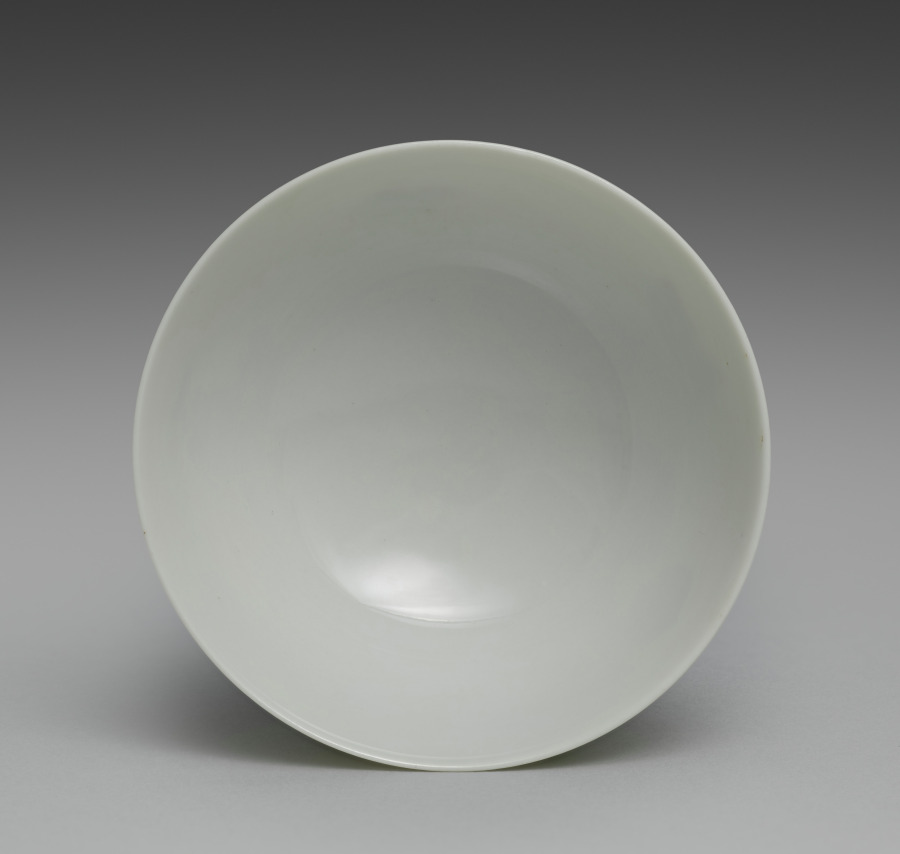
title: Teabowl from Teabowls with Peony and Crabapple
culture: Japan, Meiji period (1868–1912)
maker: Seifū Yohei III (Japanese, 1851–1914)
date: 1893–1914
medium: One from a set of five teabowls; porcelain with underglaze and overglaze color enamels and gold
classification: Ceramic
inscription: 清風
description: Overglaze color enamels are generally called iro-e (literally “color picture”) in the terminology customarily used for porcelain decoration of the Edo period. This set of teabowls is a fine example of Yohei III’s skilled use of the technique, which is identified on this set’s box lid with the alternate phrasing “porcelain with color painting” (jisaiga). Distinct from the way overglaze colors were used in Kakiemon ware from Arita, his designs and applications show a consciousness of porcelain decoration of the Qing dynasty. Here, he combines Chinese models with a sensibility taken from Kyoto ware precedents, including painting with powdered gold (kinrande). The colors used in the bowls are as follows: blue, black, gold, white, light green, green, and pink. The blue appears only inside the footring, as a double band of underglaze color. The black iron, used for stems and leaf veins, is painted over the glaze. The gold, also painted over the glaze, is used for leaves and the centers of flowers, for solid, glossy lines defining detail, or as a semimatte ground. The white of the peony flower is built up to a low relief over the glaze. Yohei has incised lines of varying widths into the pigment, carving away to the bowl’s surface, to differentiate individual petals and their rippled shapes. The light and dark greens, as well as the pink, are painted over the glaze. Of note is how Yohei has first used thinly applied lines of light green to draw the plum branch before applying the opaque iron black. For the plum buds and flowers, he has used a diluted pink with an opaque pink for outline, both over the glaze. In his later works, Yohei used pink both over and under the glaze in a manner similar to underglaze blue, and it can be challenging in some cases to discern which technique he has used. A lidded container in a private collection has a similar design but is augmented with the inclusion of white and purple magnolia blossoms. In contemplating the original decorative program of a set, of which these teabowls may have been a part, it is worth considering that perhaps not all objects included the full range of motifs. In such cases, the composition of the individual object may be best understood within the context of the extended ensemble. Here, the delicate pink plum on one side of the bowl seems slightly unbalanced with the bold white peony on the other, but when seen with other objects with the magnolia and its additional colors and shapes, it is possible to imagine a set with a complex, balanced design across multiple pieces.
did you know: Yohei III used the kinrande technique of painting with powdered gold to embellish the flowers.